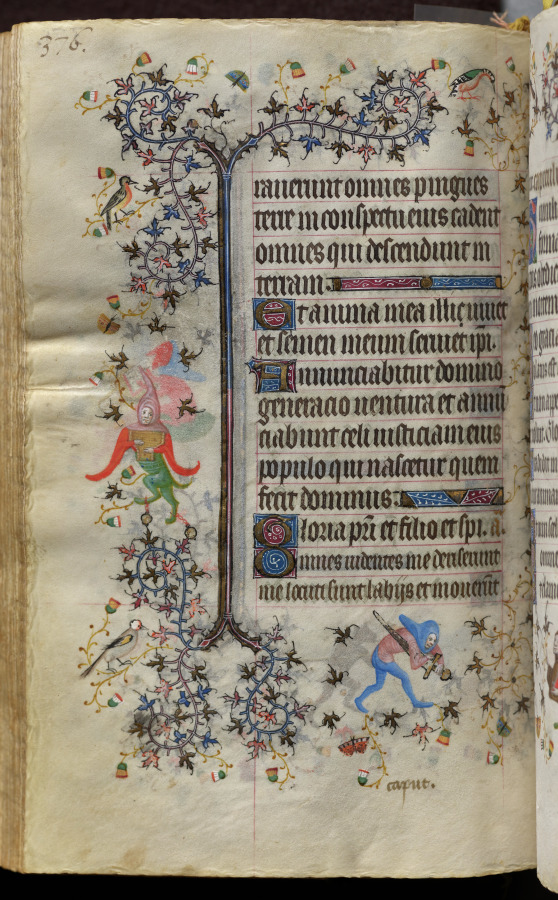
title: Hours of Charles the Noble, King of Navarre (1361-1425): fol. 183v, Text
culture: France, Paris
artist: Master of the Brussels Initials and Associates (French)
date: c. 1405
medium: ink, tempera, and gold on vellum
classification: Bound Volume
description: This precious volume was obviously highly prized by its owner, the French-born King of Navarre, who had his coat of arms painted on no less than twenty folios. Rather than directly commissioning this manuscript from a specific workshop, it seems that Charles the Noble acquired his book of hours -- perhaps ready-made for the luxury market -- while on a trip to Paris in 1404-05. A collaborative effort, six painting styles are evidenced within the pages of this codex, those of two Italians, two Frenchmen, and two Netherlanders. The painter who was responsible for the planning and decoration of the book, and who produced seventeen of the large miniatures, was a Bolognese artist known as the Master of the Brussels Initials. His principal assistant, responsible for most of the borders, was a Florentine who signed his name "Zecho" da Firenze on folio 208 verso.